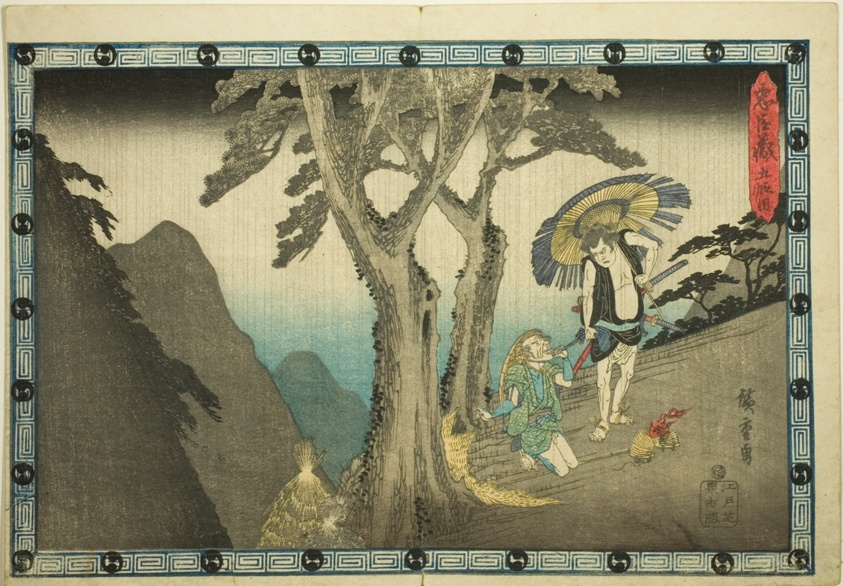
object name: Print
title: Act 5 (Godanme), from the series "The Revenge of the Loyal Retainers (Chushingura)"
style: Japanese (culture or style)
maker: Utagawa Hiroshige 歌川 広重; Japanese, 1797-1858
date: c. 1834/39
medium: Color woodblock print; oban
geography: Japan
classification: woodblock print; print; asian art